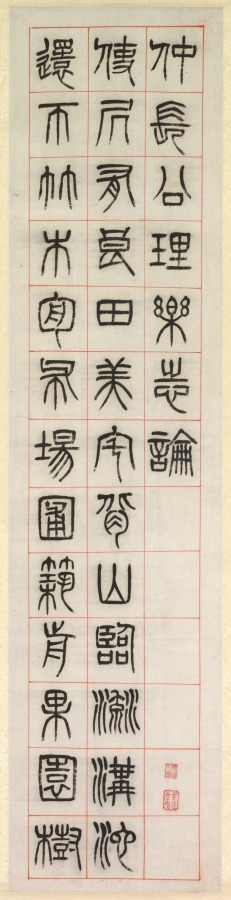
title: On Happiness, Calligraphy in Seal Script Style (zhuanshu)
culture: China, Changsu, Qing dynasty (1644-1911)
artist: Yang Yisun (Chinese, 1813–1881)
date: 1871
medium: hanging scrolls, ink on paper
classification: Painting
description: Yang Yisun transcribed this ancient text on six narrow scrolls, starting at the top right and ending at the bottom left. Yang emphasizes the text’s historic nature by using the seal script style found on stone steles and bronze vessels. On Happiness features reflections of a scholar on a leisurely life in the countryside, composed by Han dynasty official Zhongchang Tong, who died the year the Han dynasty collapsed (AD 220). The idyllic life described in the text may be an evocation of the past in a time of national crisis. A decade before Yang wrote these scrolls, Anglo-French forces had looted and burned the Summer Palace in Beijing. At the same time, the domestic Taiping rebellion (1850–64), led by a religious fanatic to overthrow the Qing government, had devastated Yang’s homeland, the Jiangnan region, with an estimated 20 million lives lost.